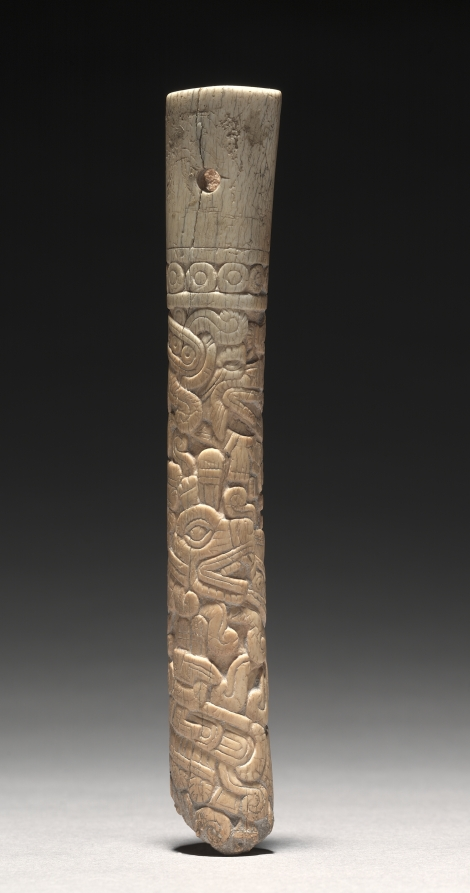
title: Carved Tube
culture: Mexico, Oaxaca, Mixtec, 13th-16th century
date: c. 1200–1519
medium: bone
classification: Jewelry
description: Carved in spiral registers, the ornamentation on this bone tube resembles Mixtec painting, both in codices (screenfold books) and architectural murals.